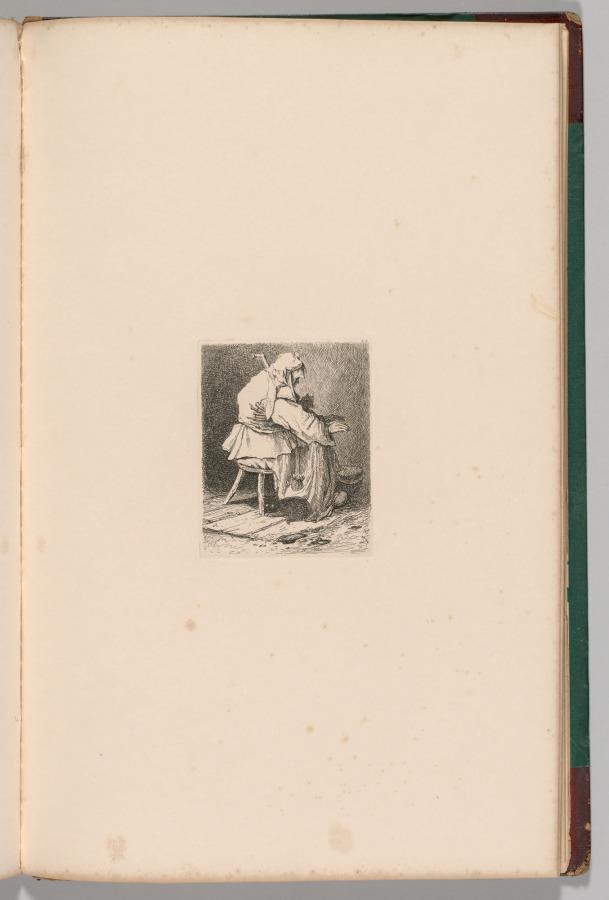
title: Liber Studiorum: Plate 44, Sketch after Rembrandt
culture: England, 19th century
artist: John Sell Cotman (British, 1782–1842)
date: 1838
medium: softground etching, from a bound volume containing 48 plates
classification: Bound Volume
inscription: In plate, within image, upper right: 44